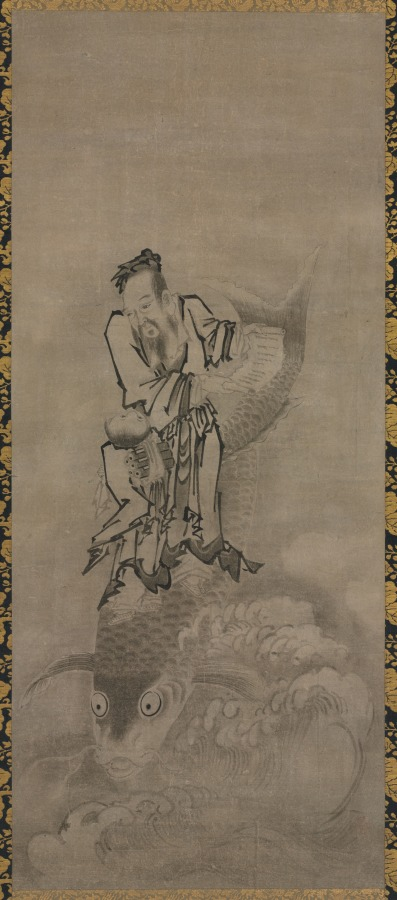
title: Hotei with Daoist Immortals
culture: Japan, Edo period (1615–1868)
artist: Kyūseki Tomonobu (Japanese, 1653–1721)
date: late 1600s–early 1700s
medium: triptych of hanging scrolls: ink on paper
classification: Painting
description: Hotei was a Chan (Zen) monk living in China during the 900s who became a legendary figure in Japan in the 1300s. At that time a popular cult praising him sprang up, extending beyond Zen to other religious communities. This rare triptych embraces a central Zen icon with flanking Daoist images, thereby suggesting the compatibility, rather than the exclusivity, of these two creeds. Hotei also enjoys popularity in Japan as a kind of folk figure, which explains his mirthful expression in Japanese paintings. The Daoist figures in contrast appear eccentric and foreign, in keeping with Daoist lore. When these paintings came to the museum their appearance was compromised by poor quality textile mountings, and cracked paper surfaces needing restoration. Following the cleaning of the paper surfaces and the repair of the lifting surface areas, each scroll was completely remounted. No inpainting was done, thereby preserving the original ink values and brushstrokes.